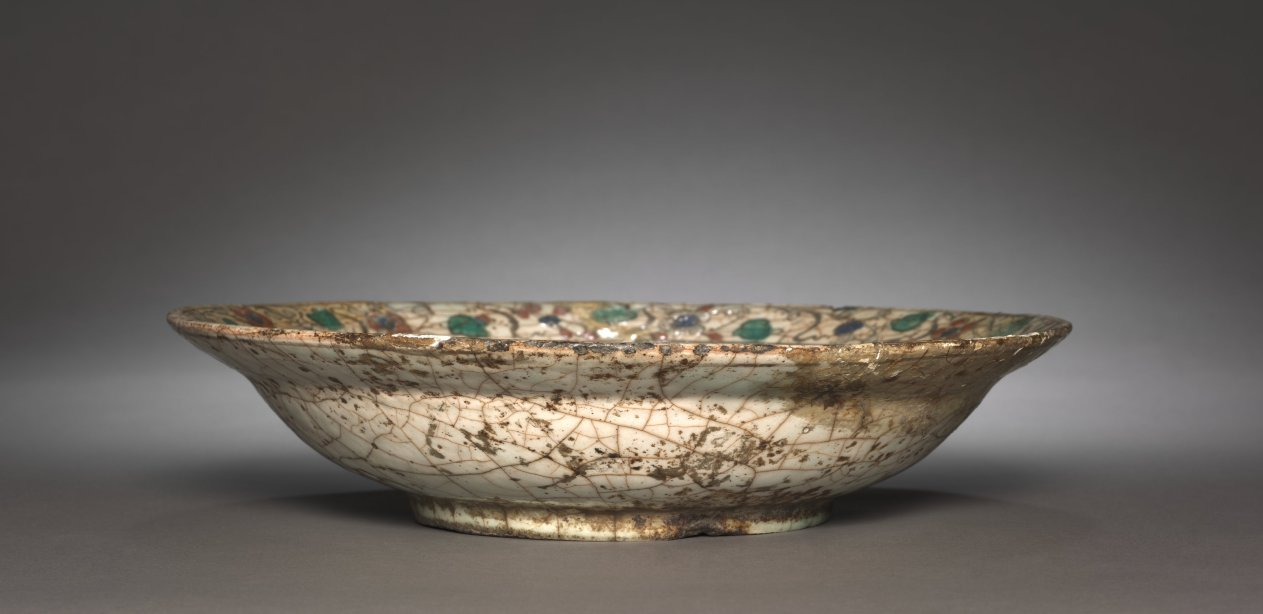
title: Bowl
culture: Iran, Safavid period (1501–1722)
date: early 1600s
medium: Fritware with underglaze design in colored slips, Kubachi ware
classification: Ceramic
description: A long-legged bird, possibly a crane, is surrounded by flowers on the inside of the bowl. The rim is encircled by a band of undulating stems and flowers in red, deep blue, turquoise-green, white, and dull green-gray. The exterior features only the crackle glaze.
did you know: This type of pottery is named after a town in the Caucasus, but most Kubachi wares were likely made in northwestern Iran.